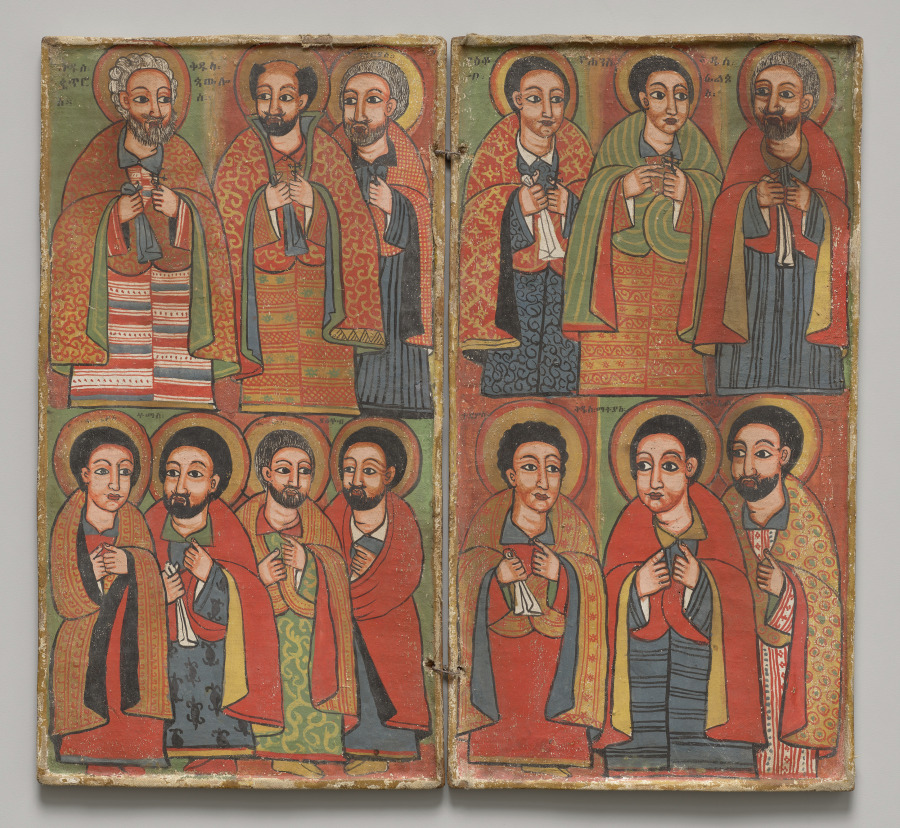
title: Diptych with Twelve Apostles & St. Paul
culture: Africa, East Africa, Ethiopia, presumably Gondär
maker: Workshop or Circle of Wäldä Maryam (Ethiopia, active mid- to late 1600s-early 1700s)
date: c. 1700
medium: Tempera, wood, textile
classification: Painting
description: Depicting 13 holy men, this diptych (two-panel painting) is sized for an Ethiopian Orthodox Christian church or elite home. It is painted in the bold, colorful style associated with royal court workshops from the early 1600s to the mid-1700s. Painter Wäldä Maryam (or someone he trained) set this scene of Christ’s apostles in the context of his homeland. Each saint wears fashionable clothing imported from India. While they are posed and dressed similarly to emphasize their group identity, the artist portrayed their faces and hairstyles individually. Captions in Ge’ez––an eastern African language dating to the 400s BCE––identify each by name.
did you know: Captions written in the language Gəˁəz identify each holy man by name. This African language is nearly 2,500 years old!